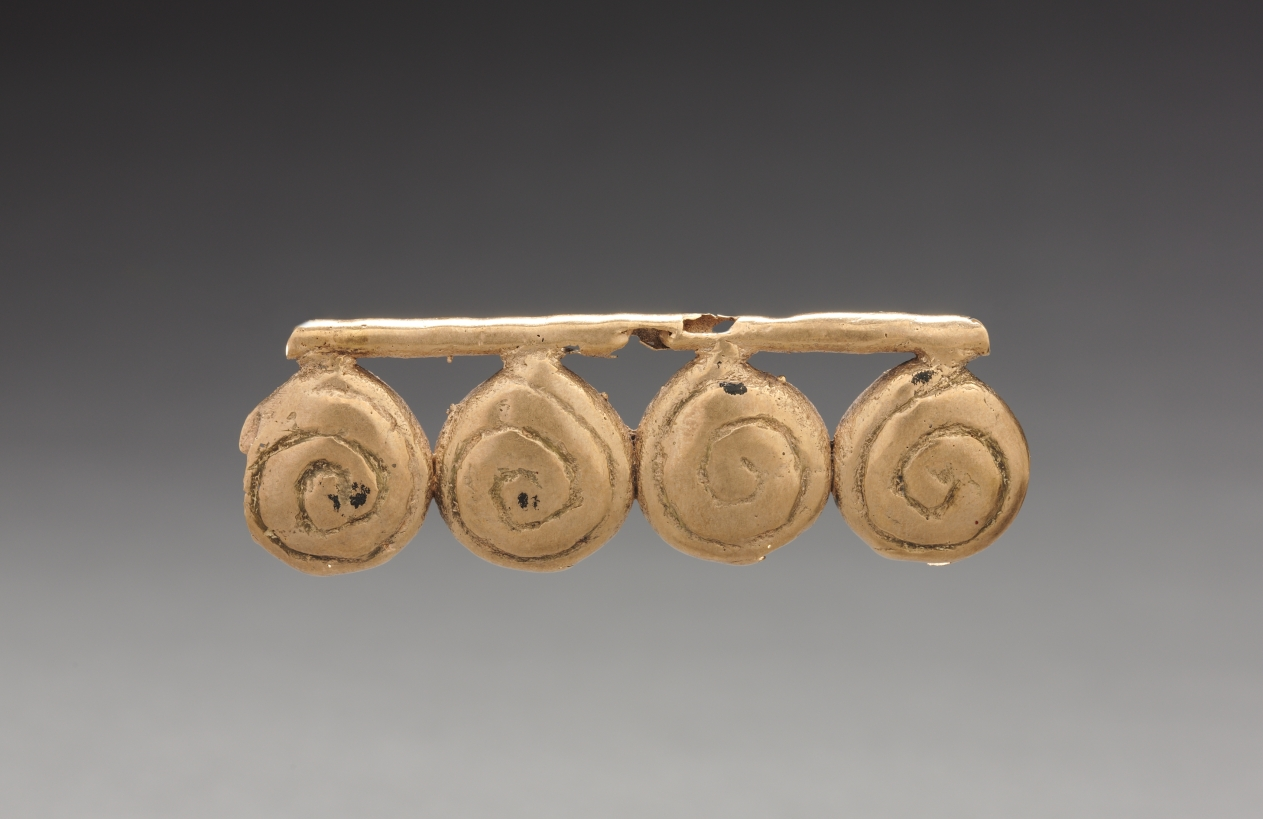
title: Linked Shells Pendant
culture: Colombia, Muisca style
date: c. 900–1550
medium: cast gold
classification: Metalwork